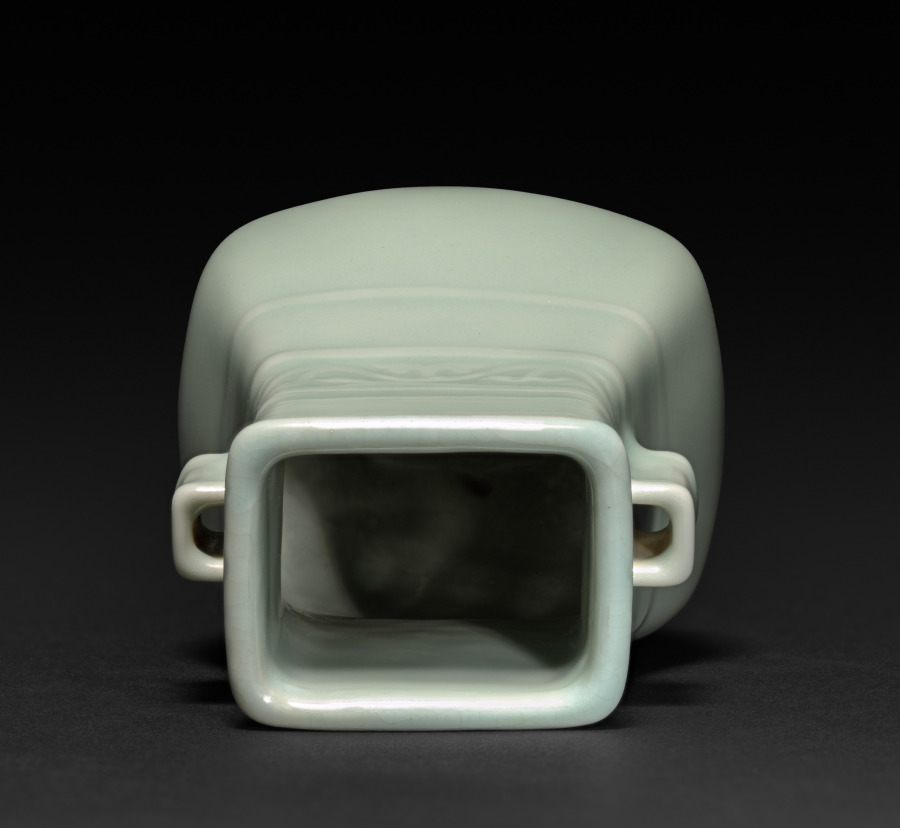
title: Vase in Form of Archaic Hu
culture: China, Jiangxi province, Jingdezhen kilns, Qing dynasty (1644-1911), Qianlong mark and reign (1736-95)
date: 1736–95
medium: porcelain with celadon glaze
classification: Ceramic